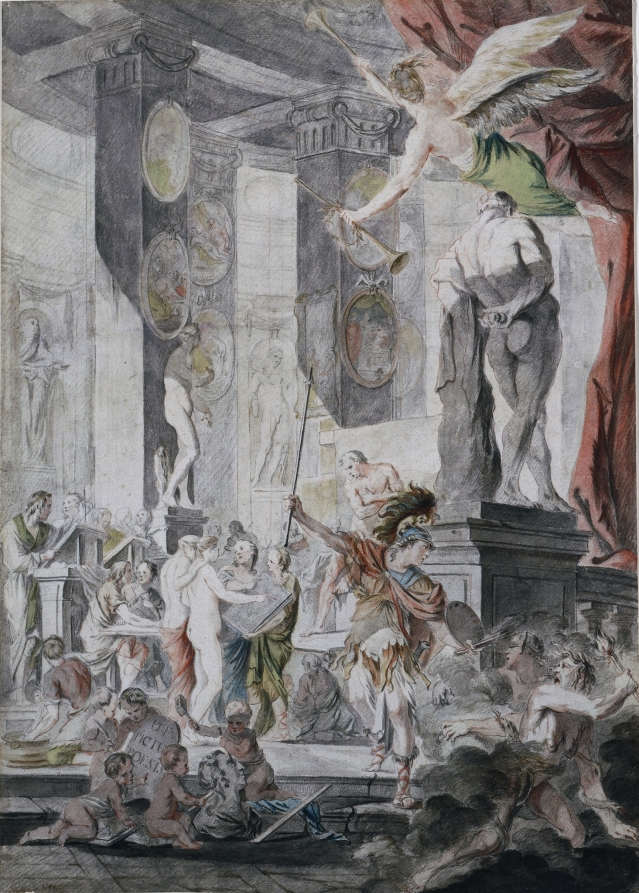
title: Ut Pictura Poesis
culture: France, 18th century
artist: Charles-François Hutin (French, 1715–1776)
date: 1745–1746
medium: Gray wash, watercolor, graphite, black chalk, and red chalk on cream laid paper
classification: Drawing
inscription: lower left, in brown ink: Natoire [4?][illegible]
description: Hutin’s drawing is an allegorical celebration of academic artistic training. The words UT PICTURA POESIS engraved on the stone tablet translate “as is painting, so is poetry.” Classical figures throughout the grand hall discuss their work as they practice different methods of making images. In the foreground, putti sculpt a portrait bust of Louis XV; behind them artists practice drawing a nude model. Among the sculptures in the room are the Farnese Hercules and the Venus de’ Medici, both famous Roman marbles in Italy, where Hutin trained from 1737 to 1742. In the upper right, Fame flies with trumpets above Minerva, the patron goddess of the arts, holding a paintbrush and palette as she drives out Ignorance and Envy.